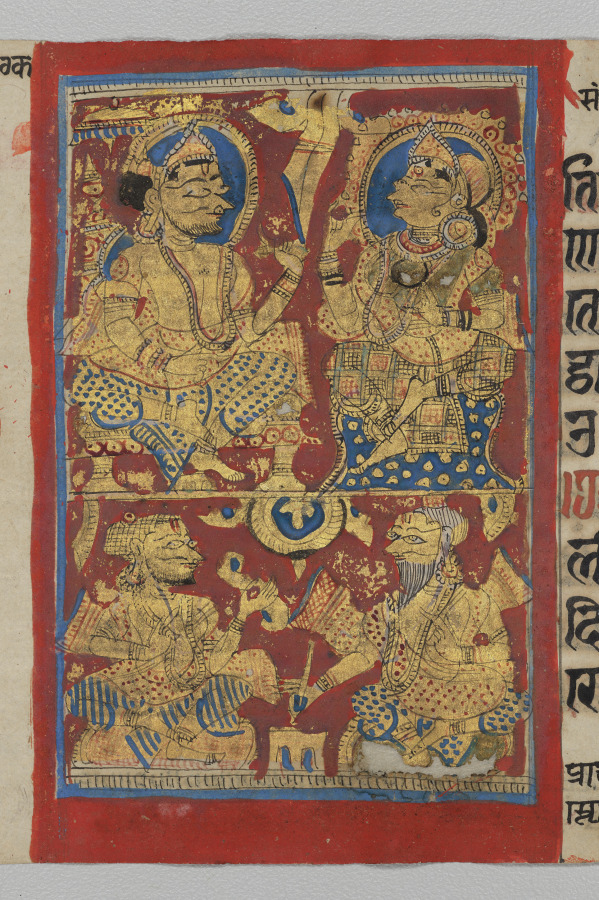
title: King Siddhartha and Queen Trishala with the Dream Interpreters, Folio 25 (verso), from a Kalpa-sutra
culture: Western India, Gujarat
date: c. 1475–1500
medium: Gum tempera, ink, and gold on paper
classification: Painting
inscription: [[upper left]] rājārāṇī svapnapāṭhaka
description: The king and queen seated in the upper register are the parents of Mahavira, founder of the Jain religion. The two bearded figures in the lower register are the learned men versed in the interpretation of dreams. One writes with a pen; the other consults a scroll. They predict that the auspicious dreams of the queen foretell the birth of a son who will either be a powerful hero and king or a religious leader of the world.